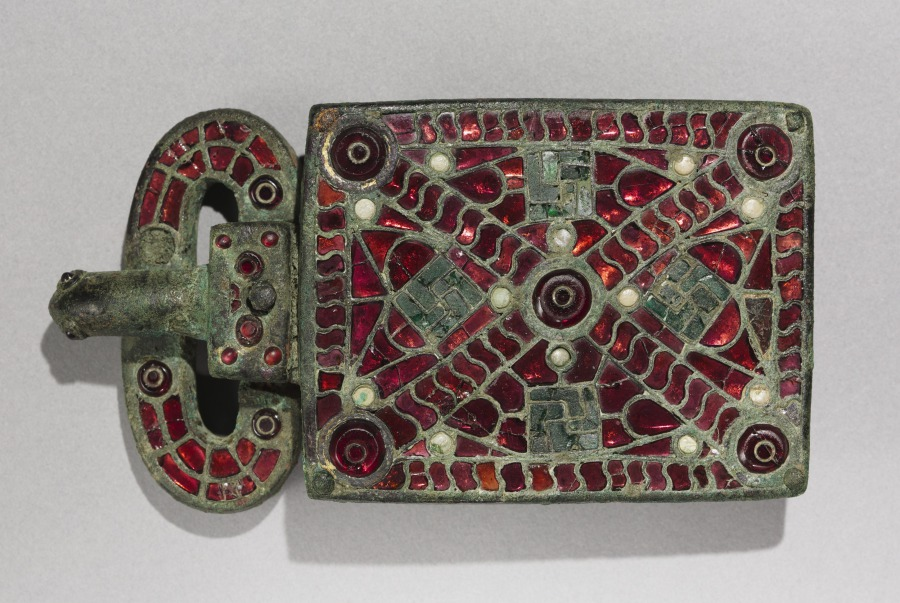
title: Belt Buckle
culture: Visigothic, Spain, Migration Period, 6th century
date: c. 525–560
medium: bronze with garnets, glass, mother of pearl, gold foil, traces of gilding; bronze and glass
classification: Jewelry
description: The art of the European Migration Period (3rd-7th centuries AD) is almost exclusively one of personal adornment-a portable art that followed men and women to their graves. Belt buckles with large rectangular attachment plates have been discovered in cemeteries across the Iberian Peninsula-now occupied by Spain and Portugal-from the period of Visigothic occupation (about AD 412-711). Their decoration varies. Finer examples, like this one, are distinguished by brilliantly inlaid semi-precious stones and colored glass. Garnets were especially prized in Visigothic society for use in cloisonné jewelry. The technique involved the fitting of carefully cut pieces of polished garnet into an intricate grid of compartments, or cloisons. This buckle is so densely inlaid with garnets that it presents a virtual "carpet" of red to the eye. These large Visigothic buckles are strikingly uniform in shape yet endlessly varied in surface design, perhaps a sign that they expressed the personal identities of their original owners. Grave excavations have shown that belt buckles of this type were made for women.